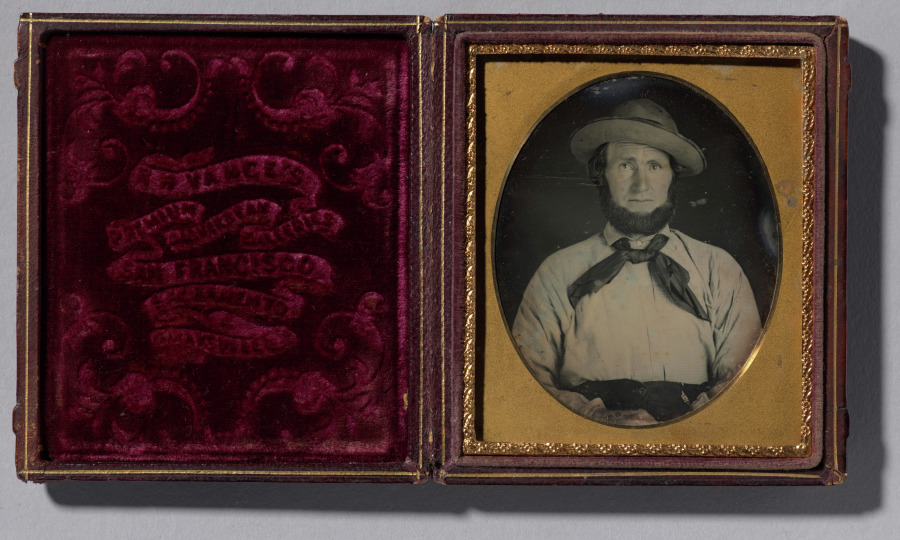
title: Miner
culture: America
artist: Robert H. Vance (American, 1825–1876)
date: c. 1853–55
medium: daguerreotype, sixth plate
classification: Photograph